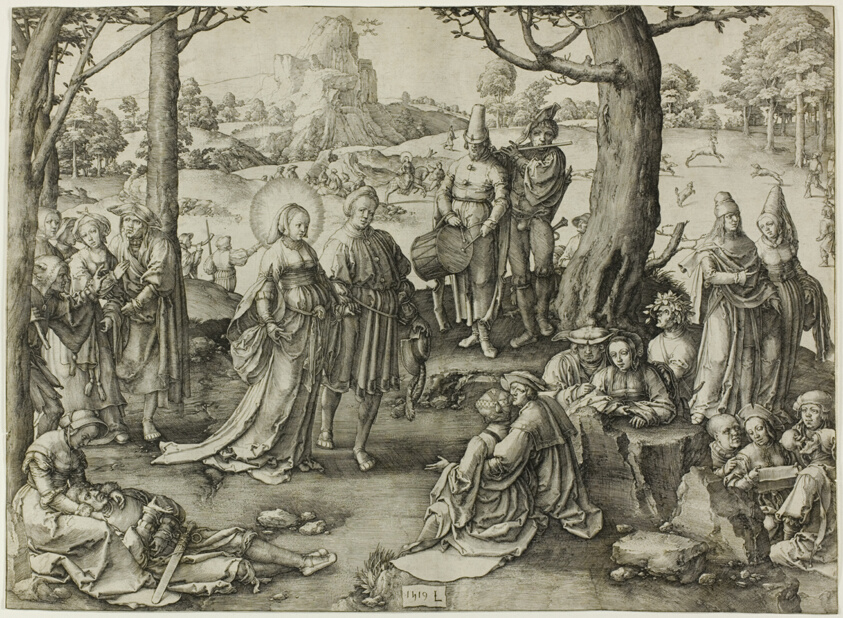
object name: Print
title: The Dance of Saint Mary Magdalene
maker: Lucas van Leyden (Netherlandish, c. 1494-1533)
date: 1519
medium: Engraving in black on ivory laid paper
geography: Netherlands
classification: engraving; print; prints and drawing